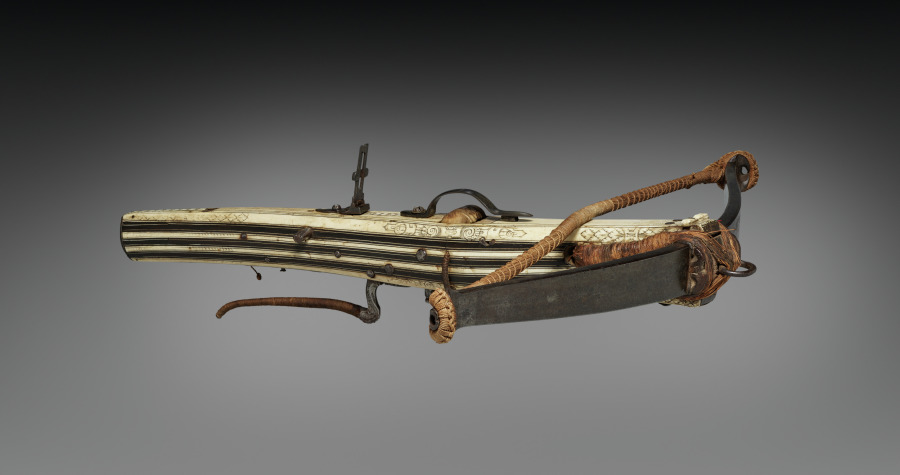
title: Crossbow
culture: Germany, early 17th Century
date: early 1600s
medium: wood, stag horn, flax cord and steel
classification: Arms and Armor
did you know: The decoration of four strips of inlaid horn was quite rare.